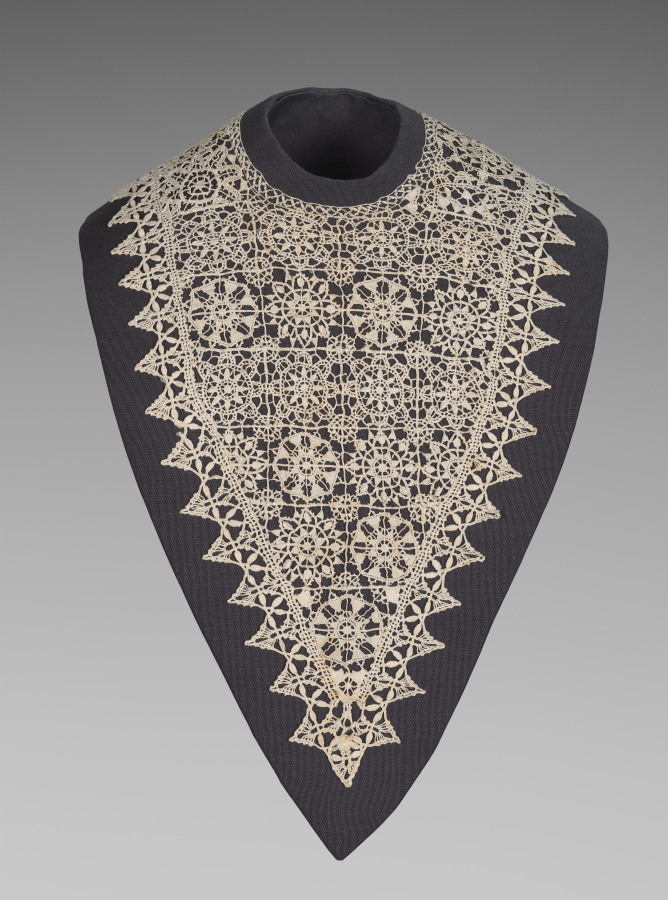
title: Lace Collar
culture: Italy, Genoa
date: 1560–1600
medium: Linen; needle lace (cutwork and reticella) and bobbin lace edging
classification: Lace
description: Large and small round motifs in a linear framework form this geometric design made in open cutwork, now known as reticella. Its fineness was cut from a linen cloth whose woven grid provided a firm ground for the embroiderer to build her lace. A similar design for open cutwork was published in a pattern book by Frederic de Vinciolo in Paris in 1587.